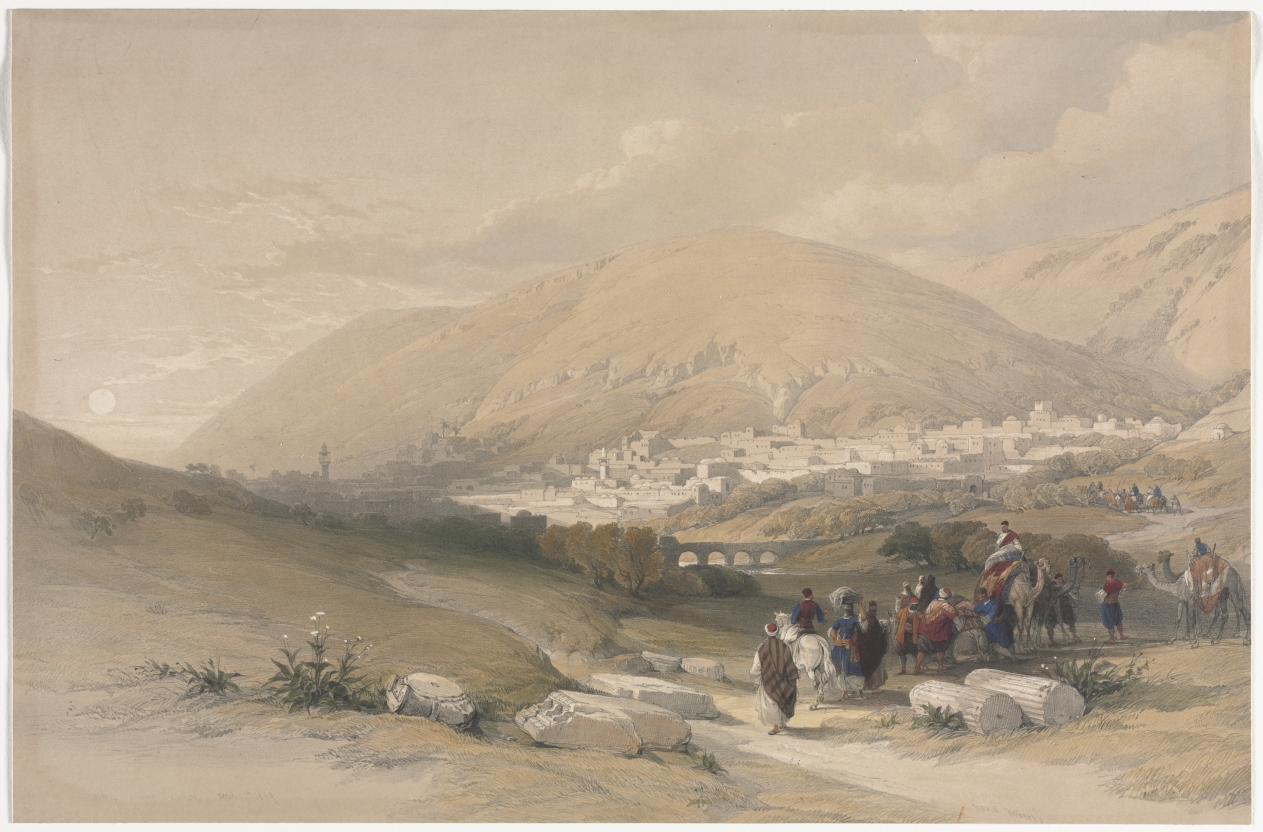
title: Nablus Ancient Shechem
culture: England, 19th century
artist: David Roberts (Scottish, 1796–1864)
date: 1839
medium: color lithograph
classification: Print